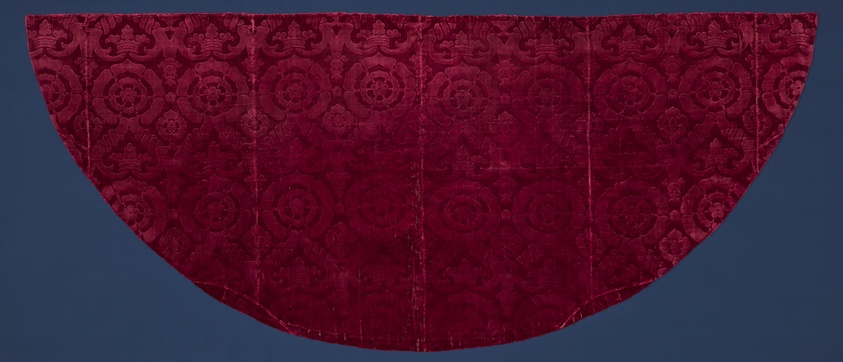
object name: Textile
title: Cope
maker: Venice, Italy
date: c. 1500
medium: Silk, satin weave cut pile-on-pile solid velvet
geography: Venice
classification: textile; costume; liturgical; weaving - velvet